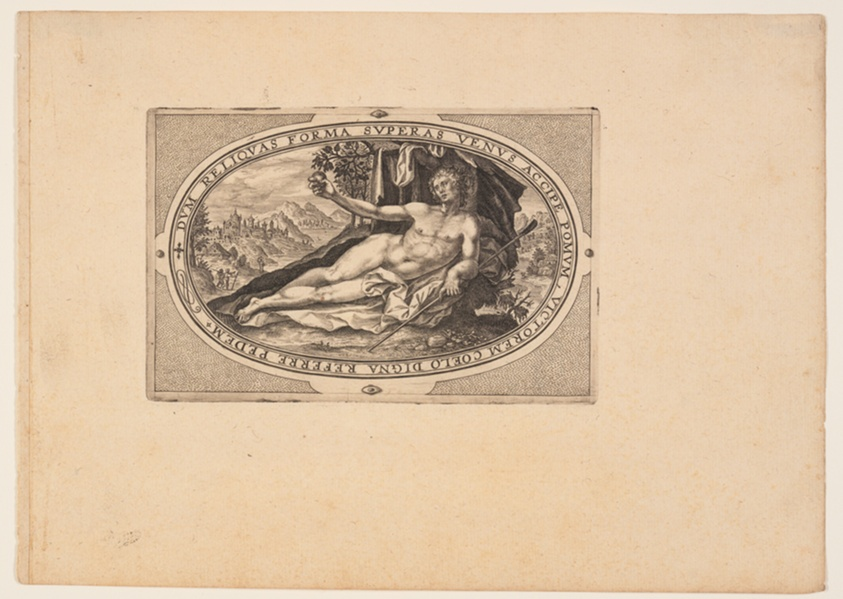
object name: Print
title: Paris, from Gods and Goddesses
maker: Crispijn van de Passe I; Dutch, c. 1565–1637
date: 1592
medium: Engraving on paper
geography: Netherlands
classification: engraving; paper; print; prints and drawing